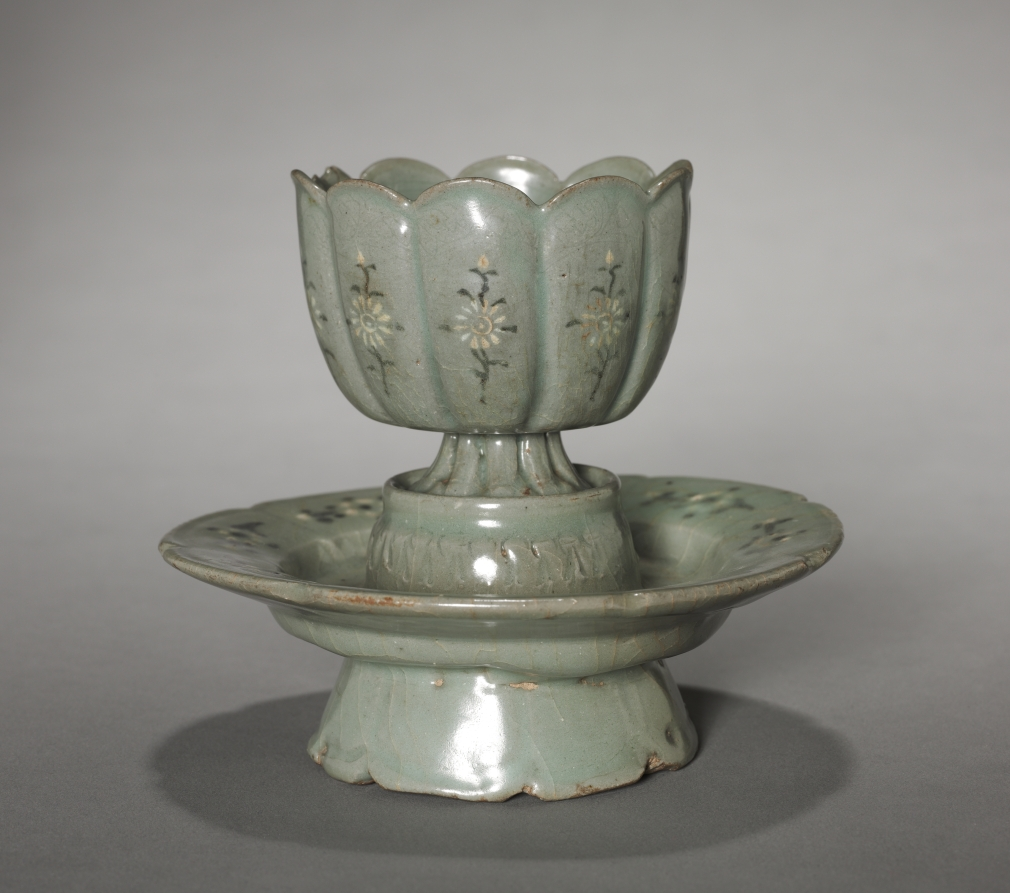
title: Floral-shaped Cup and Saucer with Inlaid Chrysanthemum Design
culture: Korea, Goryeo dynasty (918–1392)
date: 1100s-1200s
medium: Celadon ware with inlaid white and black slip decoration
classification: Ceramic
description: In Korea, chrysanthemum flowers and leaves were made into both tea and wine. Chrysanthemum wine was enjoyed during the the Double Nine Festival (the ninth day of the ninth month in the lunar calendar) praying for longevity. The flower design on the saucer is less delicate than the cup, suggesting that the cup and saucer originally were not related to each other.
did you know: Elites of the Goryeo period are known for their love of drinking tea and wine. In Korea, chrysanthemum flowers and leaves were made into both tea and wine.